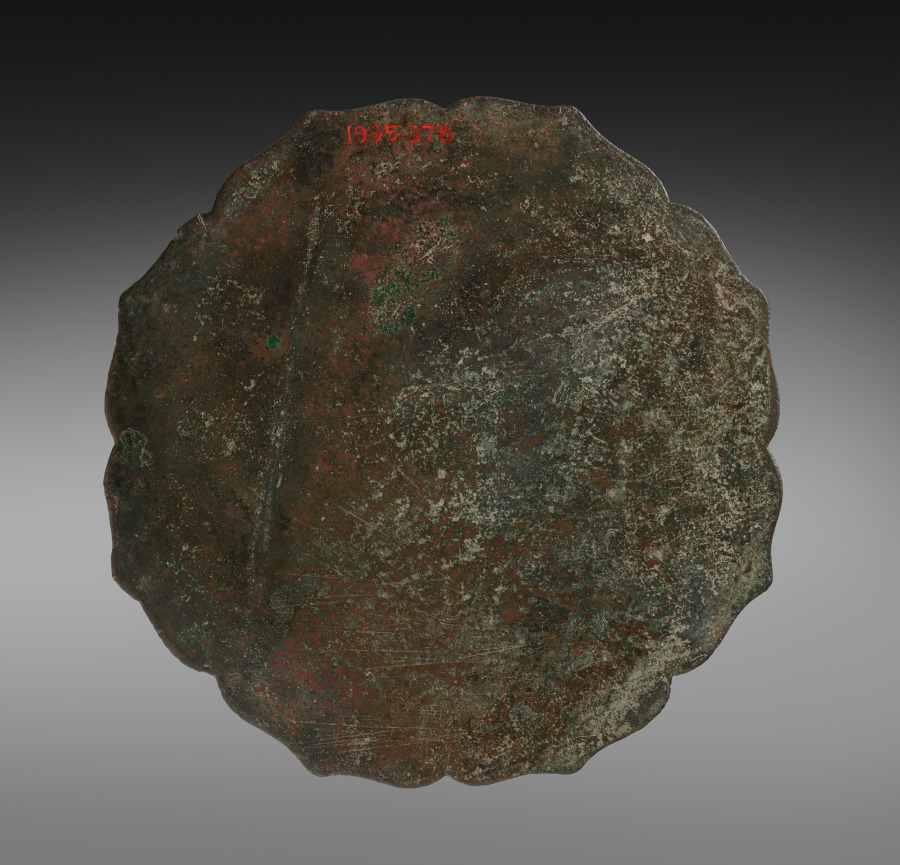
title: Octafoil Mirror with Two Immortals Crossing the Ocean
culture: China, Song dynasty (960-1279)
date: mid-900s–late 1200s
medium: bronze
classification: Metalwork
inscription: Made by the famous Zhou Yuan.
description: This mirror in the shape of a flower represents two immortals crossing the ocean, surrounded by surging waves. The younger figure on the left wears two buns on his head; the elder one with a long beard is carrying a musical instrument, sheng. The scene may illustrate “The Eight Immortals Crossing the Ocean,” in which their supernatural power to walk on water is depicted. The two men here stand on their swords to travel on water. In Daoist and Buddhist thinking, swords are considered powerful, magical implements to exorcise demons and destroy evil spirits.